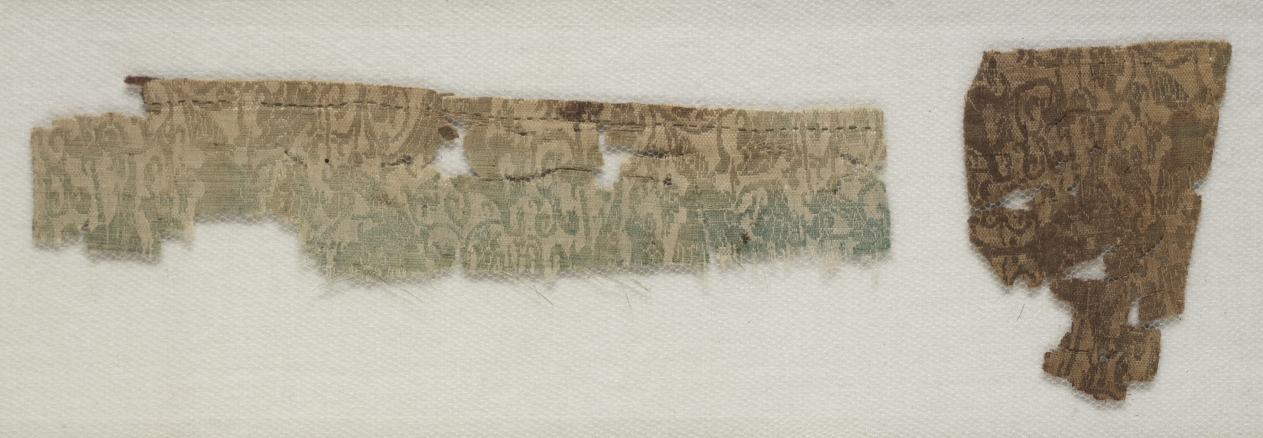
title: Fragments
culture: Egypt, Ayyubid, 12th century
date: 1100s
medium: tabby with supplementary weft; silk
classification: Textile